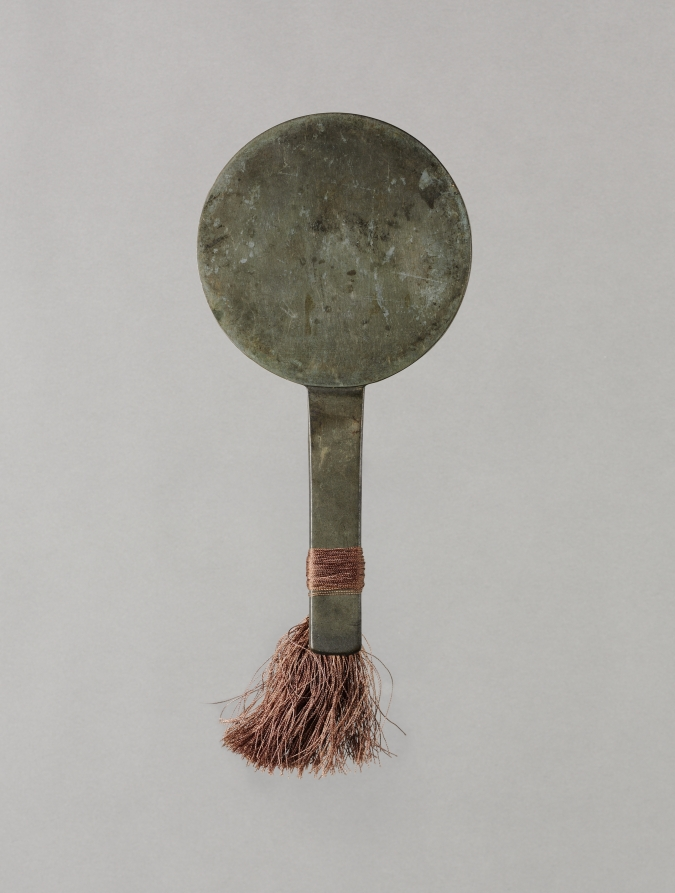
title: Mirror with Paulownia Crests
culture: Japan, Muromachi period (1392–1573)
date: 1392–1573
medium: bronze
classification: Metalwork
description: The Japanese used chrysanthemums as decorative elements on mirrors. In the Heian period, a chrysanthemum with cranes or long-tailed birds was a common motif. Later, in the Kamakura and Muromachi periods, chrysanthemum designs were divided into three patterns with different symbolic associations: Chrysanthemum with Cranes represented longevity; Water Flowing suggested longevity as well as the Noh drama Kikujido, or Chrysanthemum Boy; and East Fence alluded to the poem "Drinking Wine" by Tao Yuanming (AD 365-427). Here, the mirror featuring Buddhist iconography (kyojo) and a chrysanthemum design on the back shows that the flower was also appreciated in the context of Buddhism in the Kamakura period.